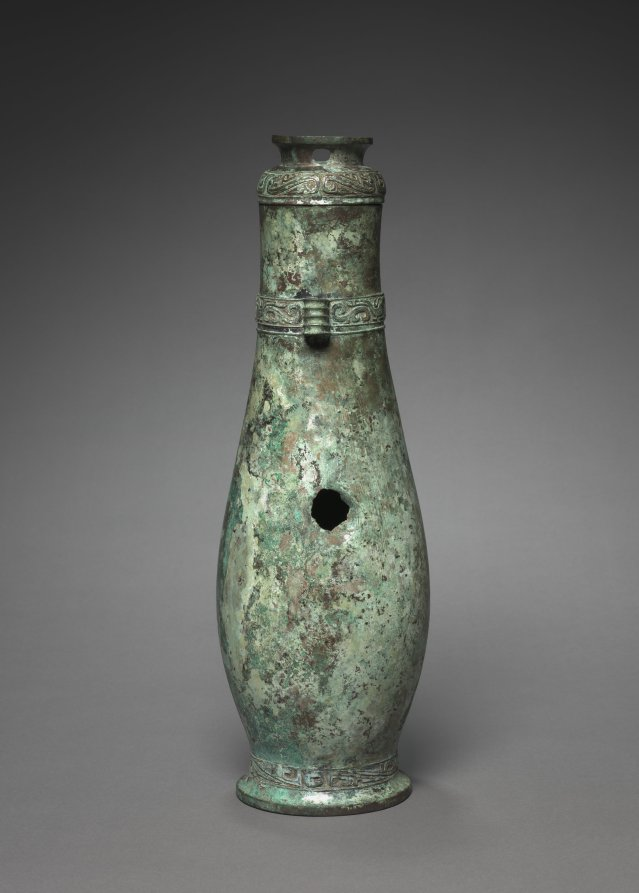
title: Wine Vessel (Hu)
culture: China, Western Zhou dynasty (c. 1046–771 BCE)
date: c. 1000–900 BCE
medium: bronze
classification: Metalwork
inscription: inscription inside top (cup): 事从作壺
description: This tall, slender bronze wine vessel, called a hu, has three bands of ornamentation: one above the foot, one around the neck, and one on the cover. Stylized birds or phoenixes are in the band around the neck, while the band on the cover and foot feature geometric dragons. The dragon and the phoenix may represent yin and yang and would be equally appropriate on a bronze of either secular or religious purposes. When inverted, the cover forms a cup. It likely held liquids like wine at festive banquets or religious ceremonies. The cylindrical "handles" at the neck band suggest that the vessel was carried by a cord.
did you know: This vessel was cast by the cire perdue, or lost wax, process.